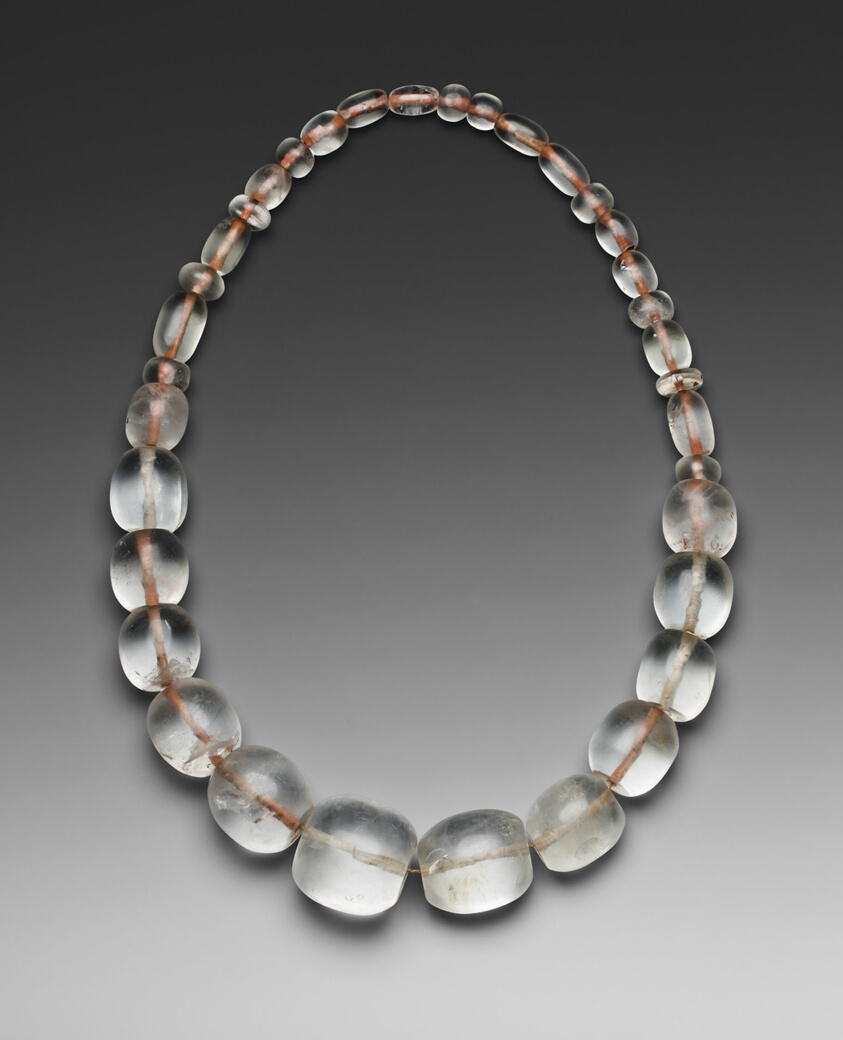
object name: Costume and Accessories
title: Necklace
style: chavín horizon, early horizon, Pre-Columbian, americas, andes, Arts of the Americas, andean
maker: Chavín (Chavín de Huantar, north coast, Peru)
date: c. 800 BCE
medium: Rock crystal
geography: Chavín de Huantar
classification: bead; art of the americas; jewelry; costume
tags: jewelry, elite, status